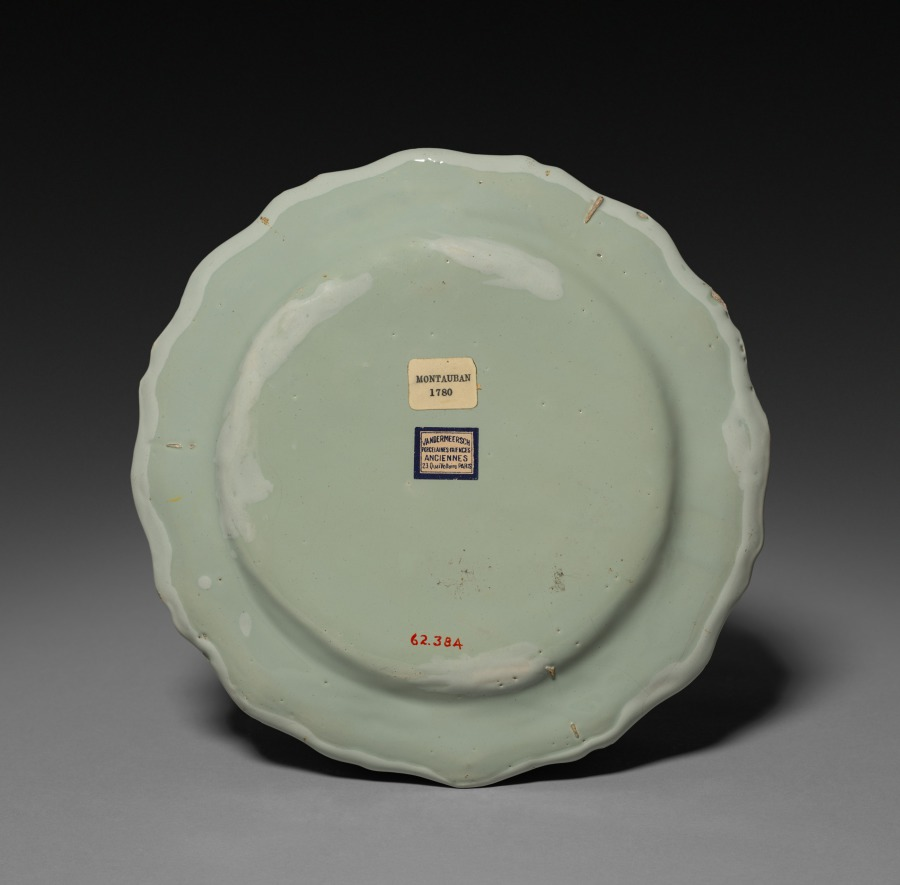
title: Plate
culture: France, Montauban(?), 18th century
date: c. 1780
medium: faience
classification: Ceramic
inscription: inscribed with French poem in center.